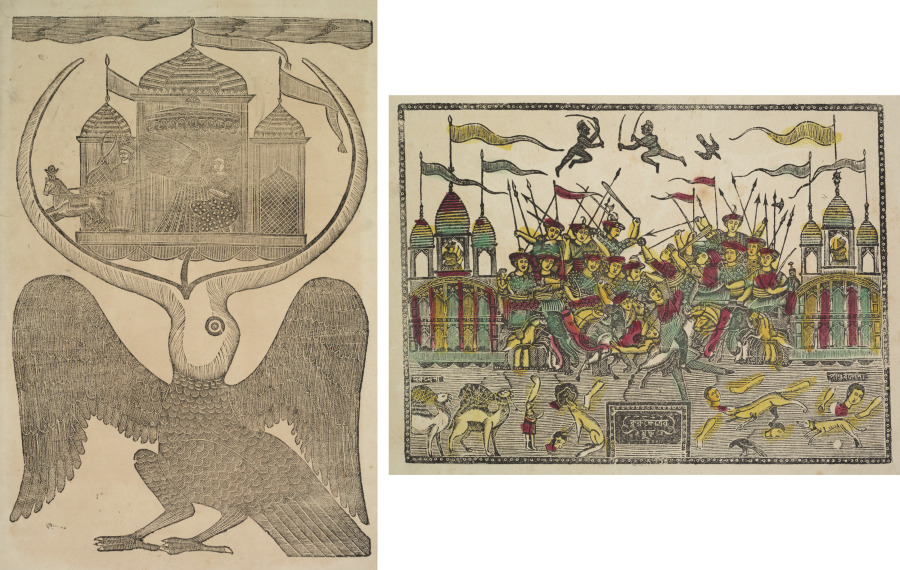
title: Leaf from a Kalighat album: Jatayu hinders Ravana’s chariot trying to prevent Sita’s abduction (recto); Battle Scene at Kurukshetra from the Mahabharata War (verso)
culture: Eastern India, Bengal, Kolkata, Kalighat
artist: Shri Gobinda Chandra Roy (Indian, active late 1800s)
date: c. 1890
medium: Woodcut, hand colored with gum tempera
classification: Print